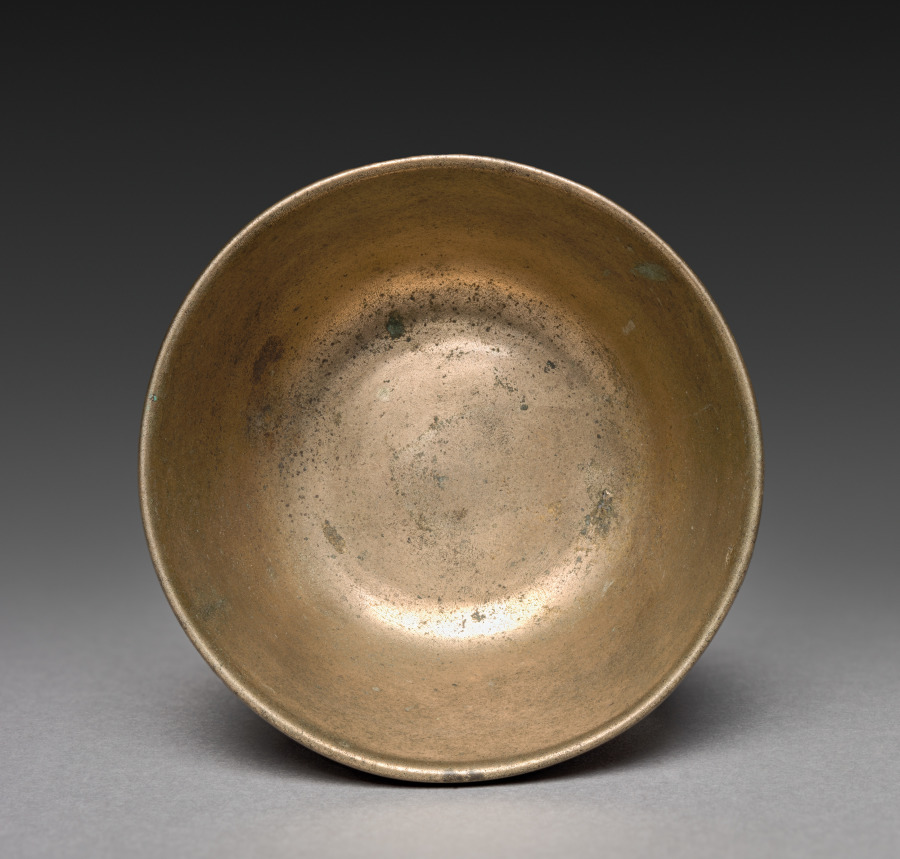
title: Wine Cup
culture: North Korea, Yochon, unassigned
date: unassigned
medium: brass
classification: Metalwork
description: In ancestor veneration rituals, deceased parents or ancestors are sanctified as spirits who are believed to oversee their descendants. Three times a year, once at the lunar new year, once at the person’s death date, and once at the time of the mid-autumn festival, food would be placed on the table for the ancestors, including fruits, rice, meat, and rice wine. During these ceremonies the worshipers’ attitude was as reverential toward the objects meant to embody the ancestors’ spirits as that toward a living parent. This pair of brass cups may have been used for ancestral rituals to contain rice wine.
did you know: This pair of bronze cups may have been used in family rituals such as ancestral worship ceremonies.